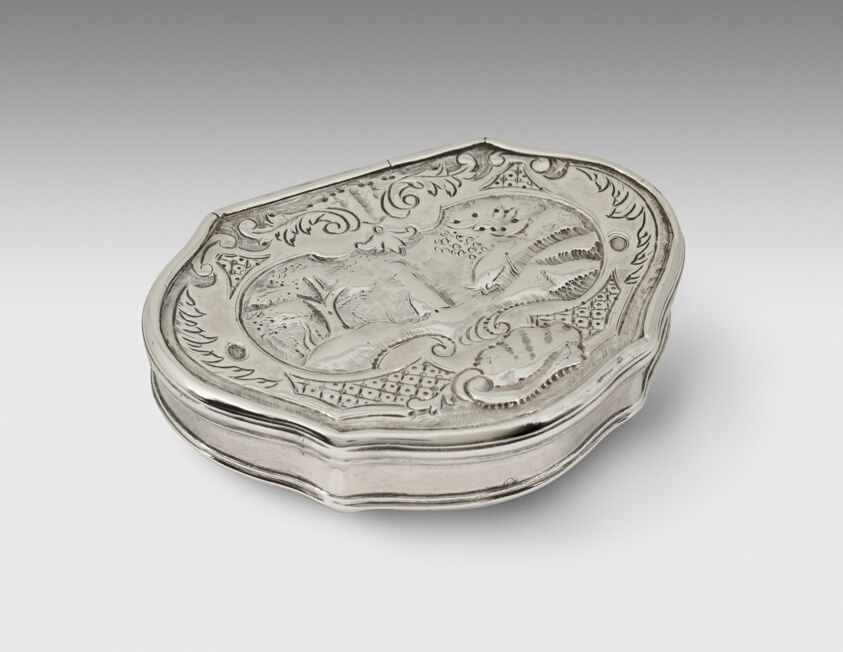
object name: Metalwork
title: Snuff Box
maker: Thomas Dane; American, 1726–1759; Boston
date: 1752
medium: Silver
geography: Boston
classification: container; snuff box; box; silver; american decorative arts; american arts; decorative arts